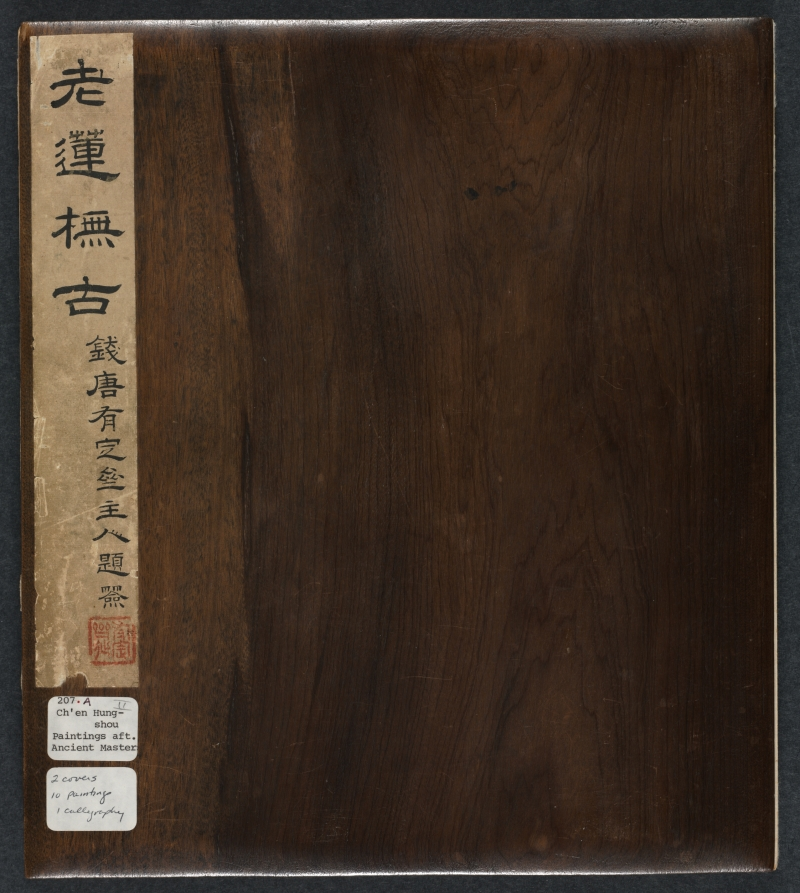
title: Paintings after Ancient Masters: Volume 2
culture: China, Ming dynasty (1368–1644)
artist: Chen Hongshou (Chinese, 1598/99–1652)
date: 1598–1652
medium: Album with eleven leaves; ink or ink and color on silk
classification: Painting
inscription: Artist's titles, signatures, and 21 seals: A. Scholars in a Garden. Hung-shou painted for old Chung. [seal] Chang-hou. B. Lao-tzu Riding an Ox. Hung-shou respectfully painted. [seal] Ch'en yin Hung-shou. C. Narcissus and Bare Trees. The Taoist Chung-ch'ing entrusted Lao-lien to paint [this]. [seal] Chang-hou. D. Autumn Landscape. Lao-lien painted this for Lao-ts'ang. [seal] Chang-hou. E. Portrait of T'ao Yuan-ming. Lao-lien [seal] Hung-shou. F. Lotus and Rocks. Hung-shou painted after the style of Ts'ui Po and presented it to the Buddhist disciple Lin Chung-ch'ing. [seal] Chang-hou. G. Taoist and Crane in Autumn Landscape. The old man Fu-ch'ih painted for the Taoist Chung-ch'ing. [seal] Chang-hou. H. Portrait of Chung-ch'ing in a Landscape. Lao-lien painted for Chung-ch'ing. [2 seals] Chang-hou; Ch'en yin Hung-shou. I. Chrysanthemum and Rock. Hung-shou [seal] Hung-shou. J. Landscape in the Style of Ni Tsan. Lao-lien [seal] Chang-hou. L. Mr. Five Willows (Wu-liu), T'ao Yung-ming. Mr. Five Willows Chung-ch'ing entrusted Hung-shou to paint [this]. [seal] Chang-hou. M. A Lohan [after Kuan-hsui]. Buddhist disciple Ch'en Hung-shou respectfully painted. [2 seals] Chun-t'i ti-tzu; Chang-hou. N. A Bird and Peach-Blossom Branch. Hui-lun-shang painted after Tao-chun [Emperor Hui-tsung] and presented it to Ts'ang-fu chu-chih. [seal] Ch'en yin Hung-shou. O. Travellers in an Autumn Landscape. Hung-shou [seal] Chang-hou. P. A Lady. Hung-shou [seal] Hung-shou. Q. Crysanthemum. Hung-shou painted in imitation of the Northern Sung style for Taoist friend, Ts'ang-fu. [seal] Chang-hou. R. Scholar Reading in a Thatched Hut by a Waterfall. Chung-ch'ing entrusted Hung-shou to paint. [seal] Chang-hou. S. Scholar with Staff and Brush. Hung-shou [seal] Chang-hou. T. An Ancient Tree. Hung-shou [seal] Chang-hou. U. Rock, Okd Tree, and Bamboo. Hung-shou [seal] Hung-shou.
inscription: 2 colophons (leaves K and V) and 34 additional seals: 24 seals of Lin Chung-ch'ing (Lin Ts'ang-fu or Lin T'ing-tung, friend of Chen Hongshou, for whom the album was painted); 2 colophons, dated 1893 and 1899, and 5 seals of Weng Tonghe 翁同龢 (1830-1904); 2 seals of Weng Tongjue 翁同爵 (older brother of Weng Tonghe; 1814-1877); 2 seals of Weng Wan-go 翁萬戈 (1918-2020); 1 unidentified.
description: The twenty paintings in this double album by Chen Hongshou include landscapes, figures, and flowers. It also has one leaf featuring a woman, an often-used subject not found in the other albums from the latter part of his career. His late works are wonderful summations of Chen's peculiar and quirky art—archaistic, hyper-refined—but without accompanying shallowness or sentimentality. His figures and landscapes in the late albums are miniaturized, not unlike the small Chinese gardens, or the carefully selected small table rocks or old roots used for contemplation to see the world in miniature. This loss of scale is quite deliberate and reflects the psychological situation of a depressed class like the Ming loyalist officials and scholars, deprived of their integrity and honor, and forced to lead a diminished and restricted existence.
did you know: This album was treasured by 5 generations of the Weng family, from imperial tutor Weng Tonghe (1830–1904) through Wango Weng (1918–2020), an art historian, connoisseur, and filmmaker.